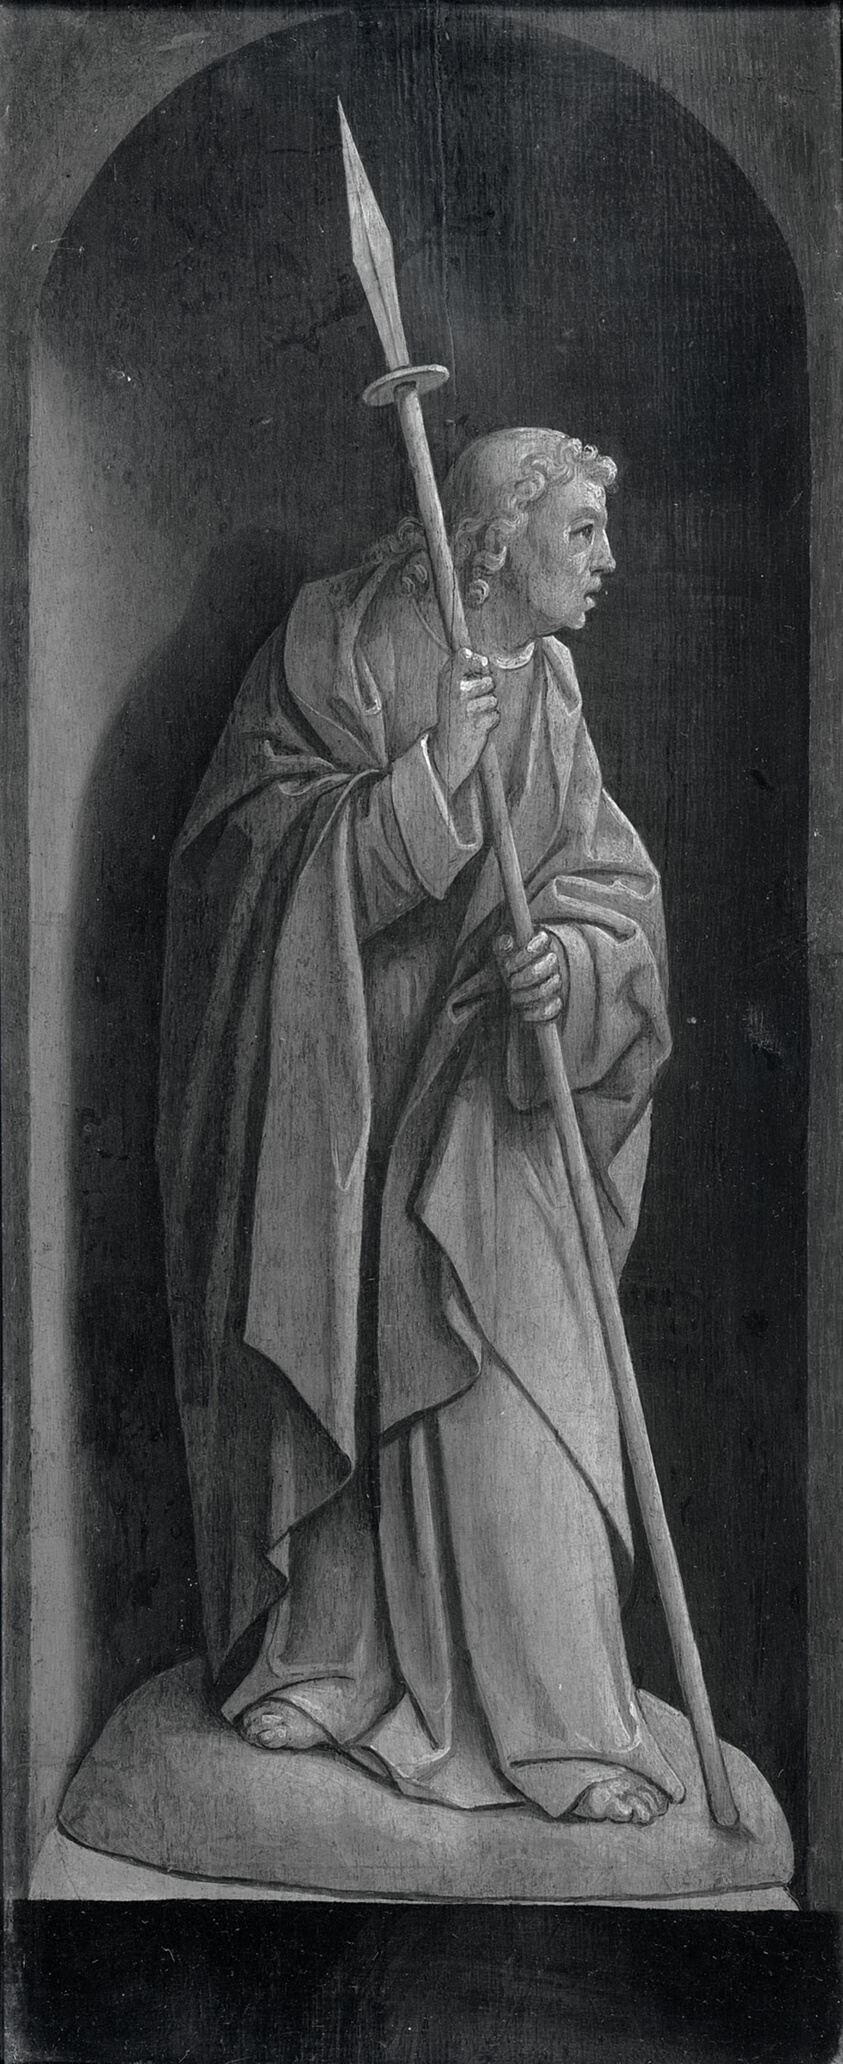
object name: Painting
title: Saint Peter and a Donor (recto); Saint Thomas (verso)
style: 16th Century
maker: Jacob Cornelisz. van Oostsanen (Netherlandish, c. 1470/75–by 1533); or Workshop of Jacob Cornelisz. van Oostsanen (Netherlandish, c. 1470/75–by 1533)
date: c. 1520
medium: Oil on panel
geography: Northern Netherlands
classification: painting; oil on panel; oil paintings (visual works); paint; european painting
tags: saints, prayer, religious, religion, Christianity, Christian subjects, Devotion, woman, man, Century of Progress, world's fairs, Chicago World's Fairs